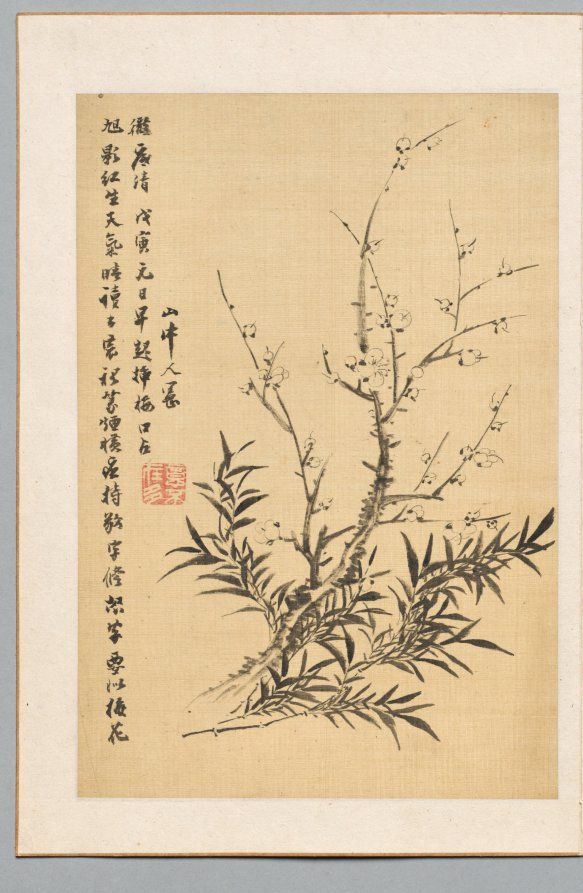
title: Plum Blossoms and Bamboo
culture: Japan, Edo period (1615–1868)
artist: Tanomura Chikuden (Japanese, 1777–1835)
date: 1818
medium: leaf from a pair of folding albums; ink and light color on paper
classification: Portfolio